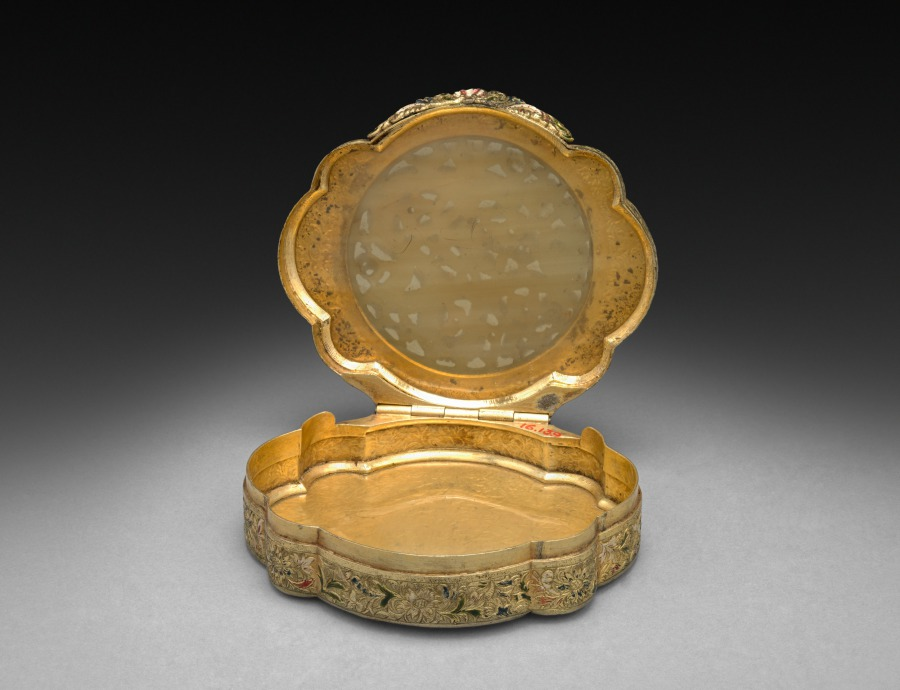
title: Box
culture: China, Qing dynasty (1644-1911) or Republican period (1912-49)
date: 1900–1916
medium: gilt and enamel with with jade medallion in cover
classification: Enamel